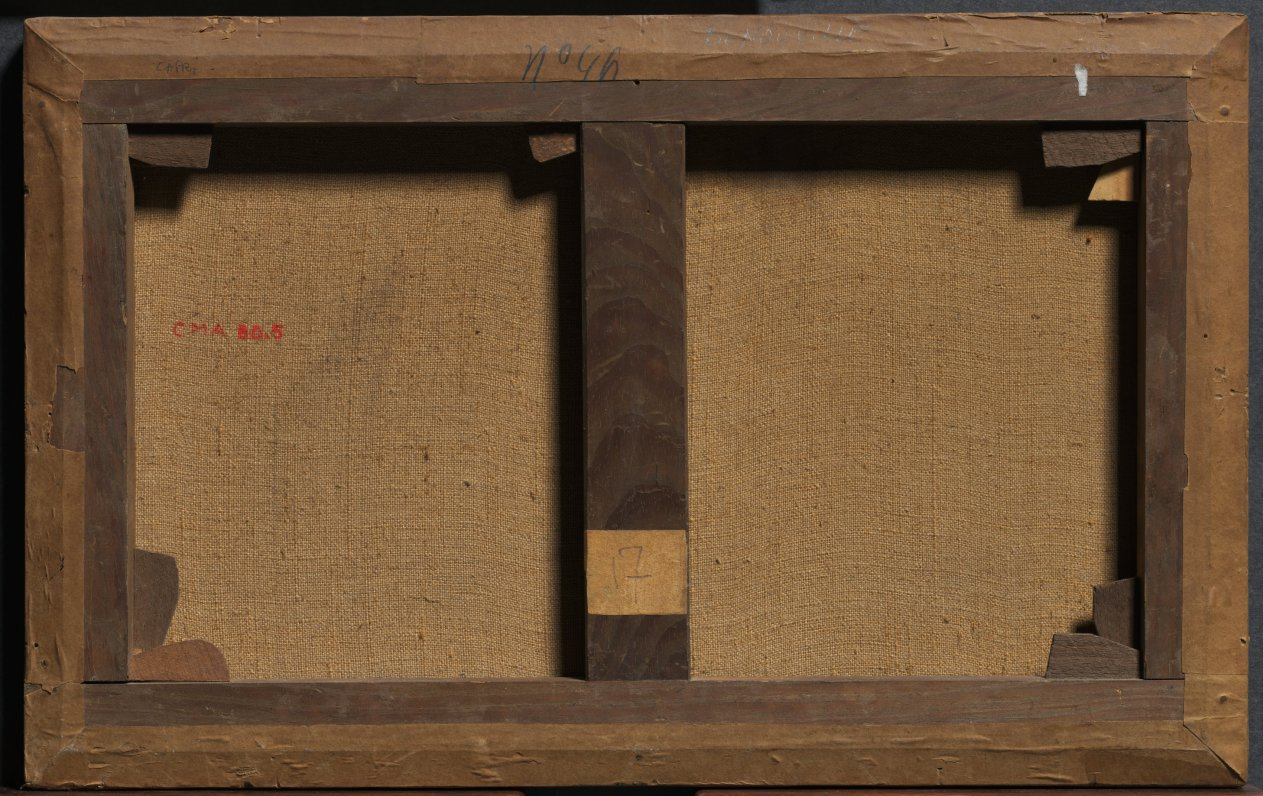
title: Capri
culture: France, 19th century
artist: Jean Achille Benouville (French, 1815–1891)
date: c. 1845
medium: oil on fabric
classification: Painting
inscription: Signed lower right: Achille Benouville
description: Located in the Mediterrean Sea, south of Rome, the island of Capri has been famous since Roman times for its spectacular scenery and mild climate. In the 19th century it became the home of many European nobles, and attracted artists from across the continent. Here Benouville captured the beauty of the island's rocky coastline, focusing his attention on a path leading toward the city of Capri and past the rocky outcropping of Monte Solaro. Fascinated by the Italian landscape, Benouville spent years in Italy drawing and painting the countryside. From 1838 to 1845 he made at least three trips there, and in 1845, after winning the Prix de Rome—a fellowship allowing promising artists to study in that city—he spent much of the next 25 years in Italy. Although trained to paint landscapes in a very formal manner, after leaving France Benouville began to paint his subjects with a much more personal, nontraditional approach. This may account for this picture's unusual composition, in which much of the canvas is given to indistinct but beautifully painted stone, sky, and water.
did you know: A pair of figures rest on the right side of the composition—both in white garments, taking in the refreshing scent of the sea air.